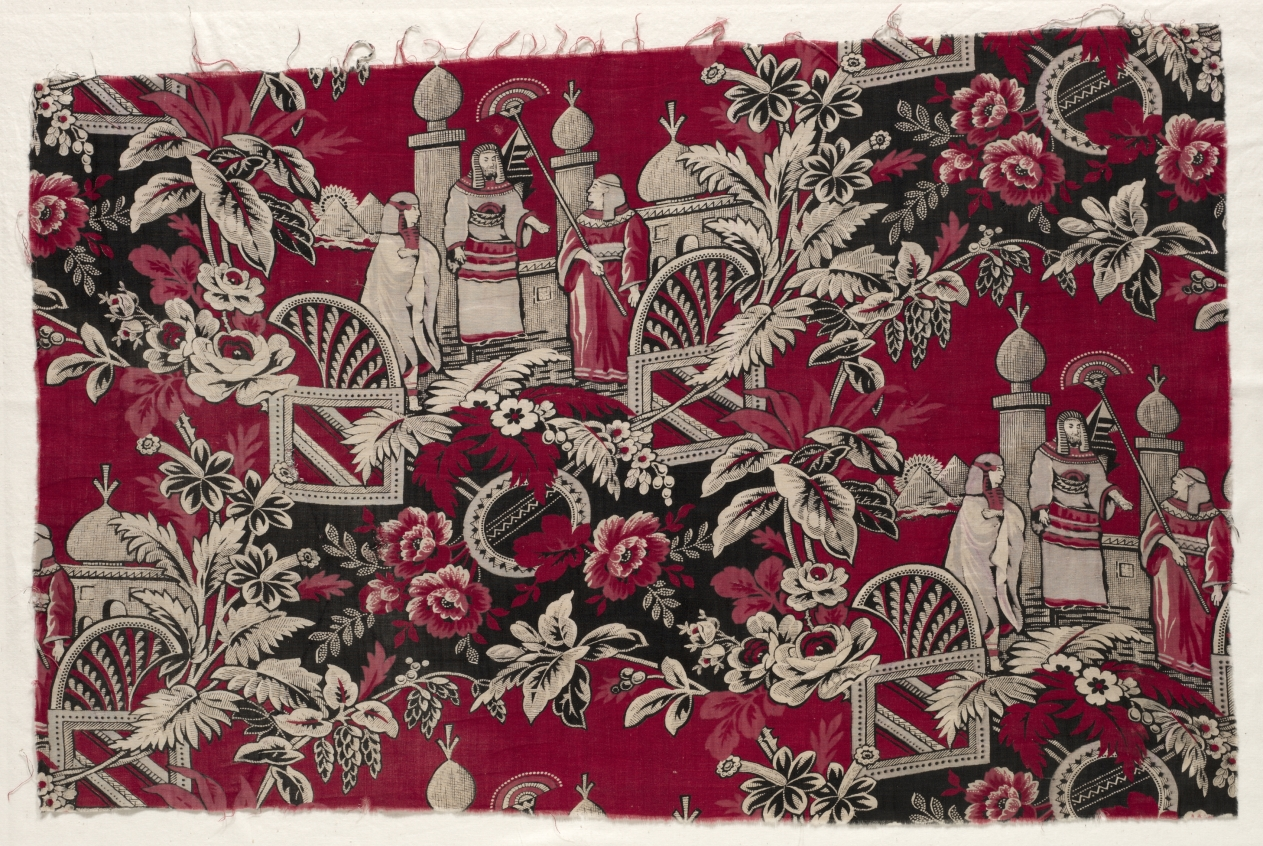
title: Printed Cotton with Egyptian Scene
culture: England, 19th century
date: 1800s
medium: block printed cotton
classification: Textile